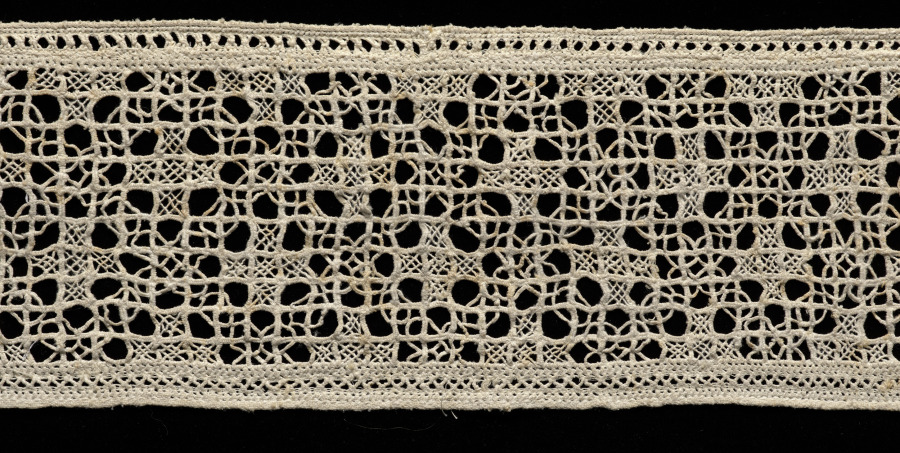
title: Lace Band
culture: Italy, 1800s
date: 1800s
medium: Linen: needle lace (Reticella) and drawnwork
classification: Lace